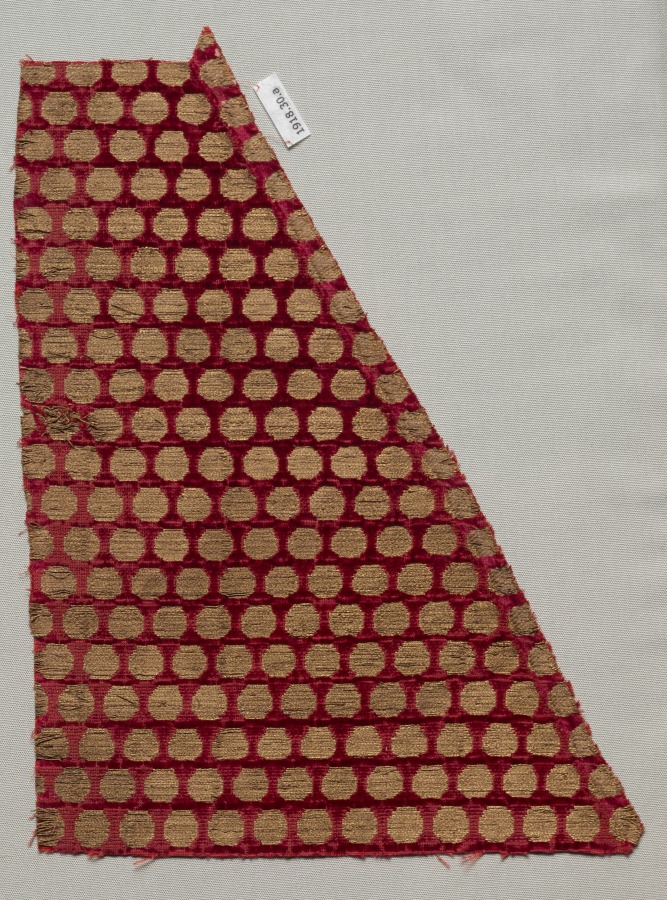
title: Velvet Fragment in Two Pieces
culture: Iran or Iraq, 14th century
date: 1300s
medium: velvet, lancé, silk and Cyprian gold around silk core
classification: Velvet